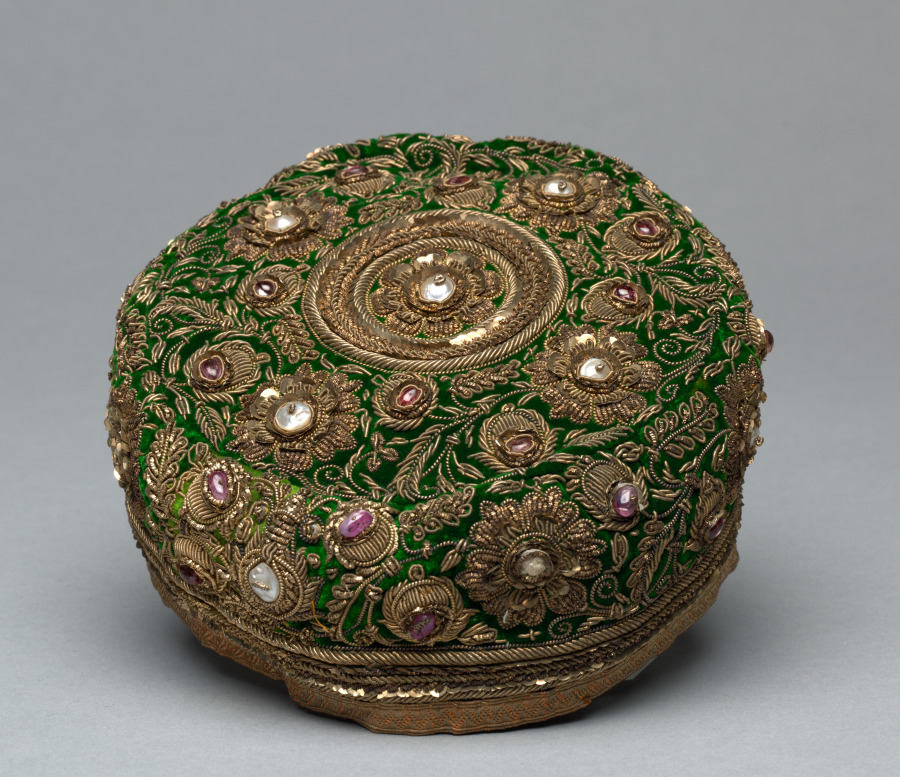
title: Cap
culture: India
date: 1800s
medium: Velvet embroidered with gilt-silver–wrapped silk thread (zari); silk: lining; rubies, pearls, and spinels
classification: Garment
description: Historically in India, head coverings were worn in outdoor and formal contexts and can signal age, allegiance, and status among Indian men and boys. A low round cap such as this was worn primarily by the well-educated aristocratic boys in the king’s circle. The painstaking process of creating the ornament involved wrapping gilt-silver wire of various dimensions around a silk thread core to create a textured appearance for the flowers and vines.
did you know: The semiprecious rose-colored spinels were considered a talisman for military victory.